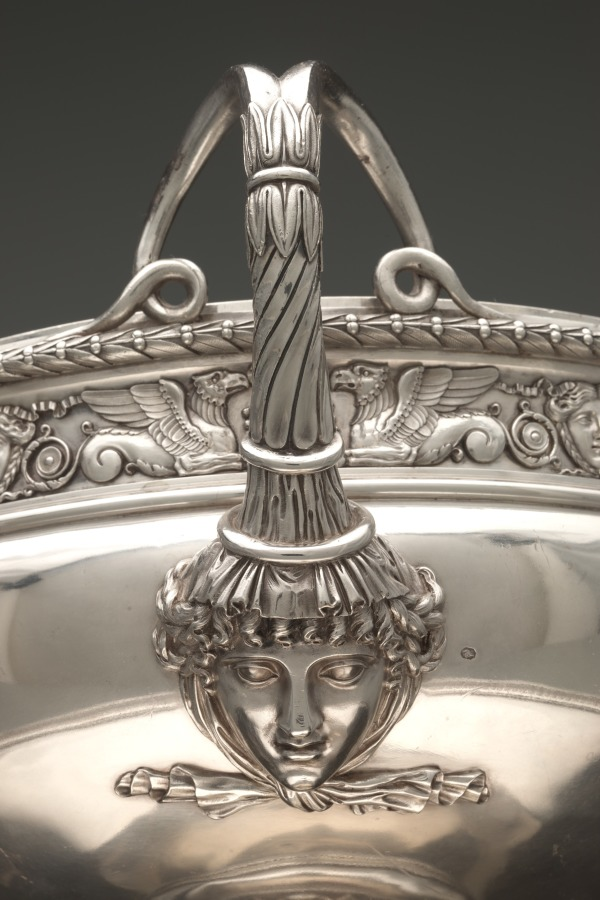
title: Covered Tureen on Stand (Pot à oille)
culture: France, late 18th-early 19th Century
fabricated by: Henry Auguste (French, 1759–1816)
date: 1797–98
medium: silver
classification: Silver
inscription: [Coat-of-arms of Amoral don Federico Carlos Gravina on bowl; cover; stand]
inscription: [Assay mark for large-sized work, 1798-1809, lining exterior; tureen foot exterior]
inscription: [Assay mark for medium-sized work, 1798-1809, beneath stand foot; on edge of cover]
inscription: [Maker's mark of Henri Auguste, master silversmith in 1785, beneath tureen foot; beneath stand foot; inside stand foot edge]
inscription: [Official assay mark for first standard silver, Paris, 1798-1809, beneath stand foot; lining exterior; on cover]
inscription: [Official mark for silver imported from countries with customs conventions, 1838-1912, beneath stand foot; edge of cover; tureen lip exterior; lining exterior; on one tureen handle; outside stand foot; tureen foot exterior]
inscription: [Unknown mark, possibly Ceres' profile in square with "E" and "7", beneath stand foot; on cover; rim of lining; tureen foot exterior; tureen lip exterior]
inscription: [Unofficial assay mark for first standard silver, Paris, 1794-1797, beneath foot stand; beneath tureen foot; near tureen handle exterior]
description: This pot-à-oille was designed by master goldsmith Henri Auguste after drawings by draftsman and sculptor Jean Guillaume Moitte. Though many of the neoclassical decorative elements on this piece are pulled from Moitte’s design, Auguste’s final product leaves out much of the proposed ornamentation. Instead this object finds distinction in its large size and smooth expanses of silver that emphasize the purity of its lines.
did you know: The coat of arms on the body of the work corresponds to the family of Federico Carlos Gravina, a Sicilian-Spanish admiral who was known to have had a close diplomatic relationship with Napoleon I.